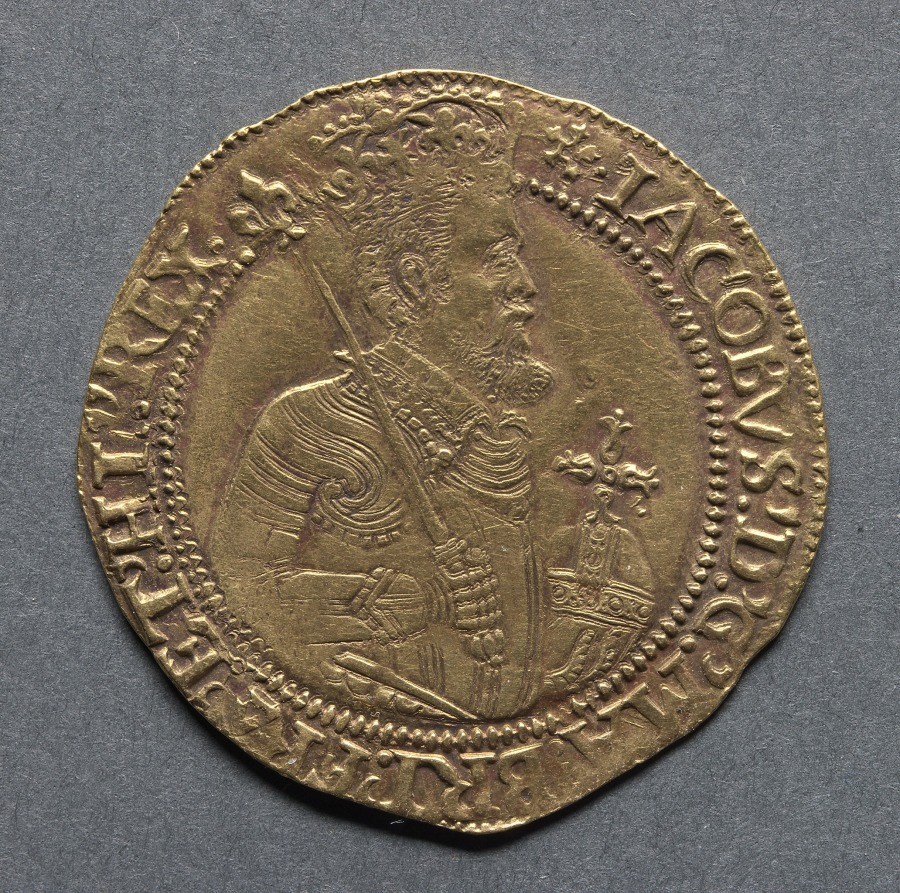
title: Unite: James I (obverse); Shield of Arms (reverse)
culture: England, James I, 1603-1625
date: 1613–15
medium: gold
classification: Coins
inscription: IACOBVS D G ANG SCO FRAN ET HIB REX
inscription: FACIAM EOS IN GENTEM VNAM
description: The unite was one of the new denominations introduced after the coinage had been down-rated by ten percent and then restored in 1611. It was so named because the accession of James I brought about the union of the thrones of England and Scotland. On the obverse the king's titles now read James by the grace of God King of England, Scotland, France and Ireland. While on the reverse is a reference to Ezekiel 37:2 in the Vulgate Bible, I Will Make Them One Nation.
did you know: The shield of Scotland shows a lion while that of Ireland is the harp.